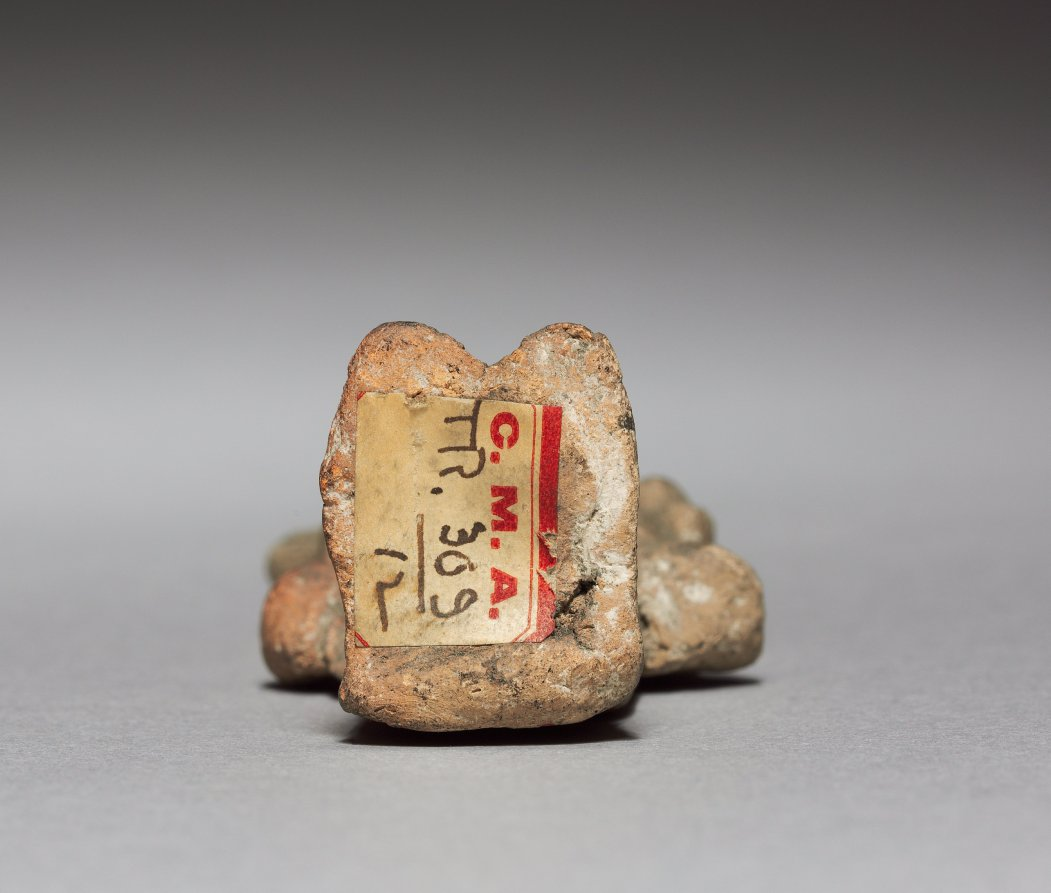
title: Figurine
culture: Mexico, Aztec, 14th century-16th century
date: 1325–1521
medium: terracotta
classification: Ceramic